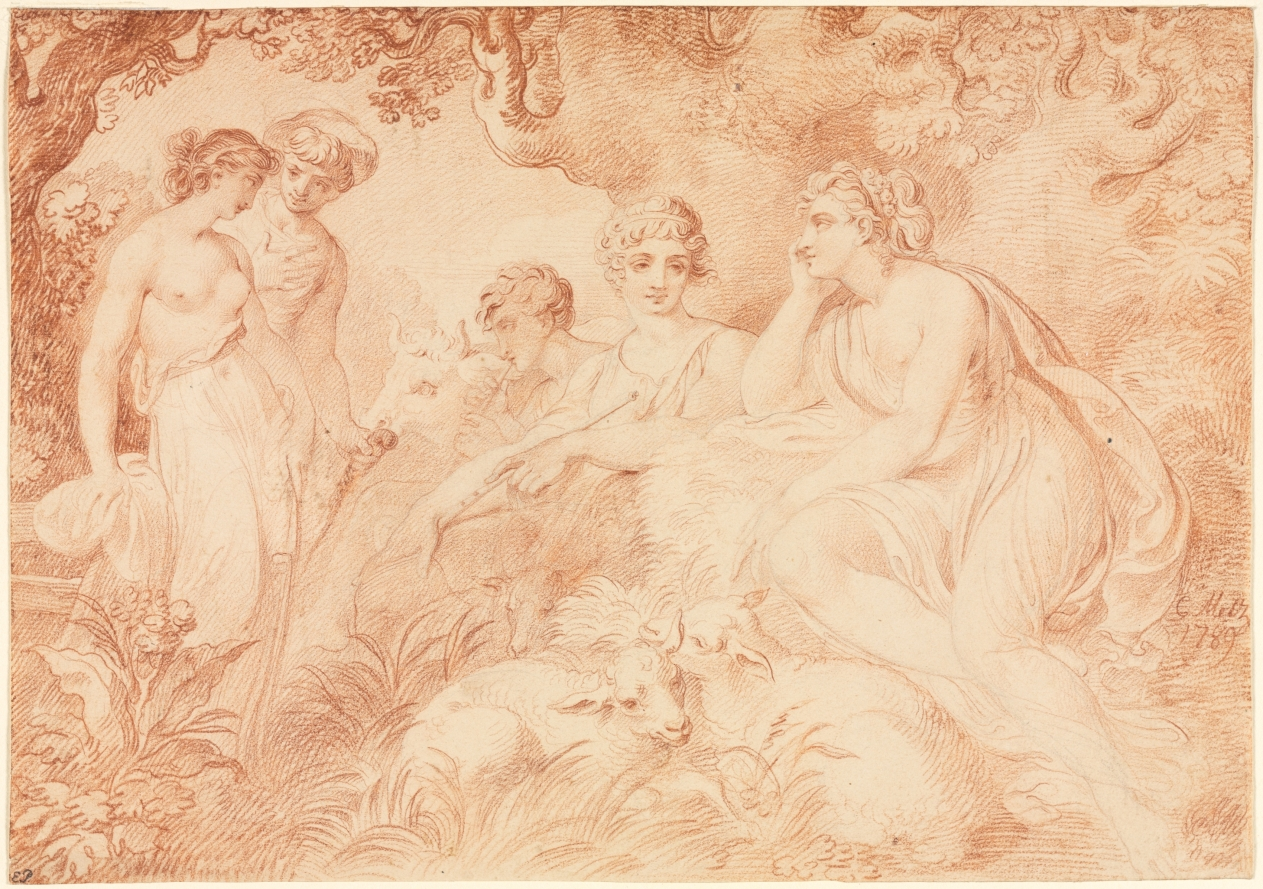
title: Shepherds and Shepherdesses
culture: France, 18th century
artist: Conrad Martin Metz (German, 1749–1827)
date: 1789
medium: red chalk over black chalk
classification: Drawing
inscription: signed, lower right, in red chalk: C Metz / 1789 ; VERSO, upper left, in graphite: 3 [circled] ; upper left, in graphite: Metz [sideways] ; lower left, in graphite: 2790 SLATKIN ; lower center, in graphite: blue ; lower center in graphite: 12 x 15 / 18 ; lower right, in graphite: 308 ; lower right, in graphite: ZEO [partially erased] / FU / ZEO